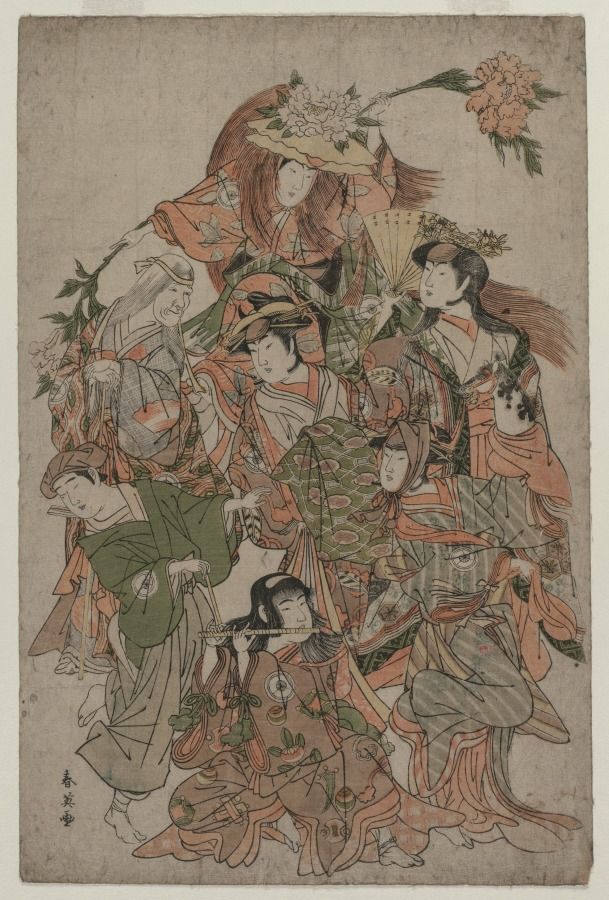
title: Iwai Hanshiro IV in a Dance of Seven Changes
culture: Japan, Edo period (1615–1868)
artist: Katsukawa Shunei (Japanese, 1762–1819)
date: c. 1793 or 1794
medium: color woodblock print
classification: Print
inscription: Signature: Shunei ga